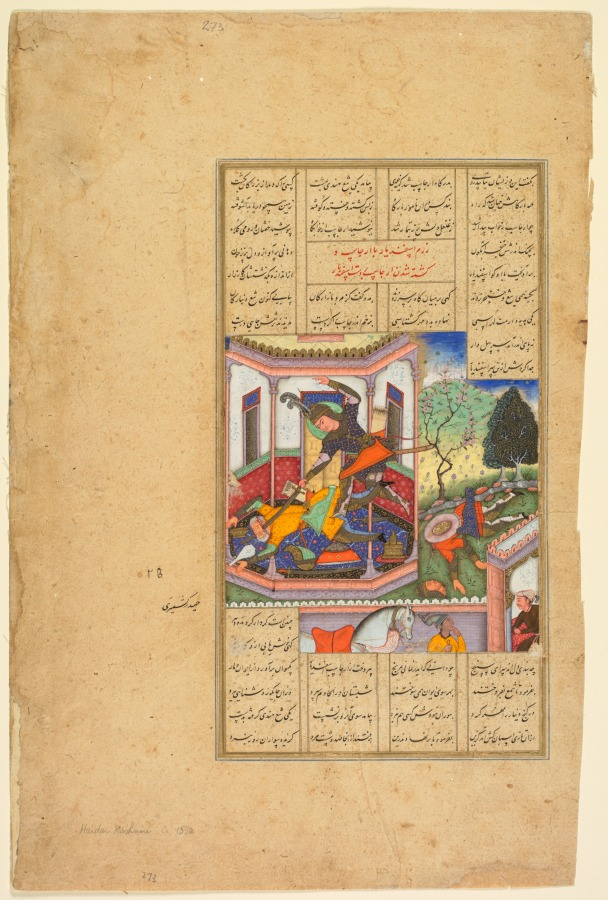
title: Isfandiyar slays Arjasp, the king of Turan, from a Shah-nama (Book of Kings) of Firdausi (Persian, about 934–1020)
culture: Mughal India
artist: Haidar Kashmiri (Indian, active late 1500s-early 1600s)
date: 1600–1605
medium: Gum tempera, ink, and gold on paper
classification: Painting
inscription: Persian inscription in left margin, in nasta‘liq script: 25 / Haidar Kashmiri; Persian title in nasta‘liq script: The Battle of Isfandiyar with Arjasp and The killing of Arjasp by the hand of Isfandiyar; Persian text in nasta‘liq script: He uttered these words, and hurried away from them Toward Arjasp’s court, bent on revenge He went forth, grasping a blade of Indian steel, Whomever of the notables his eyes fell on, was killed on the way So that in passing through the royal hall Hard it was to pick one’s way: So many wounded, battered, and dead Had turned the ground into a turbulent sea. When Arjasp awoke from his sleep His heart was troubled on hearing the din That he could not make out in the bedchamber. He put on his mail shirt and Roman-fashioned helmet Clutching in hand a burnished dagger, He shouted loud, blood coursing through his heart. The warrior Isfandiyar confronted him. They fought beyond measure and scale, Exchanging daggers and swords in a furious feud At times targeting the head, at times the waist, To him he (Isfandiyar) said, “Now from the tradesman Will you receive the gift of a blade, one glittering like a silver denarius. I have it as a gift for you, worthy enough to come from Luhrasp, inlaid with Gushtasp’s seal. He made Arjasp go limp and lifeless by the delivered cuts Nowhere on his body did he leave untouched. His mammoth body toppled over His head severed from the body by Isfandiyar. Such is the conduct of the revolving fortune: At times it offers us a honeyed potion, at others a deadly poison Why tie your heart to this transient place Since you know that you will not stay forever, do not grieve and pine. Having dealt with Arjasp, Isfandiyar Gutted the palace, its smoke reaching as far as Saturn He ordered torches lit Setting fire to the palace from all sides He entrusted his (Arjasp’s) women’s quarters to a eunuch, Taking all luster away from the place. He sealed off the treasury No one in Turan was now equal to his fight. He went to the stables and mounted A blade of Indian steel in his hand He selected among the Arab horses there And ordered them saddled A hundred and sixty men rode away from there Handpicked riders for the day of battle.; Verso: Text of Isfandiyar slays Arjasp, the king of Turan: Persian inscription in bottom margin, in nasta‘liq script: The army realized Persian text in nasta‘liq script: [cont. from recto] He furnished mounts, moreover, for his sisters, And marched forth from the court-gate of Arjasp, But left a few Iranians, men of name, With noble Sawa in the hold. “When we,” He said, “have gone outside the walls, I and my noble warriors, to the plain, Secure the gate against the Turkman troops, And may my good star aid me. When ye think That I have joined our noble troops outside, Then—let the watchmen from the lookout cry: ‘Blessed be the head and crown of Shah Gushtasp.’ And when the Turkman troops come toward the hold, In flight retreating from the battlefield, Then you shall throw the head of King Arjasp Before them from the tower of the watch.” The valiant hero rushed upon the plain, And slaughtered all the Turkmans that he found. As he approached the troops of Bishutan They saw and praised him in amazement that he, Who was so young, should show such bravery. When the moon had left her silver throne, And when three watches of the night had passed, The watchman shouted lustily, proclaiming: “Gushtasp, the Shah, has gained the victory, And may Isfandiyar be ever young. May heaven, moon, and fortune be his helpers, Who has in vengeance for Luhrasp beheaded Arjasp and, adding luster to our Grace And customs, cast him down from throne to dust, And made the name and fortune of Gushtasp Resplendent.” Hearing such a cry the Turkmans All listened while Kuhram grew dark of heart By reason of that watchman, was astonished, And spoke thus to Andariman: “How clear This cry is in the night! What do you say Can be the cause? Let us consult, for who Would dare to bawl thus by the monarch’s couch And after dark? What tricks might such a one Play in the day of battle, and thus bring Our nobles into straits! So send and have His head cut off, whoever he may be. If one of our own household is our foe, And he is backing up our enemies. “With evil words and evil presages, Then will we brain him with an evil mace.” Now when the cry went on persistently Kuhram was stricken to the heart with anger Against the watchman whose utterance, spread abroad In such a fashion, filled the nobles’ ears. The soldiers said: “The shouts increase, beyond A watchman’s! Let us drive the foemen forth And after take this host” Kuhram, who was straitened At heart about that watchman, writhed and frowned. He told the troops: “These men have filled my heart With dread about the king. We must return At once, past question. What may happen after I know not.” So that night they left the field, Where Isfandiyar, with ox-head mace And wearing mail, pursued them. When Kuhram had reached The portal of the hold, and saw the Iranians Pursuing, “What is left us,” he exclaimed: “But to fight with brave Isfandiyar? Unsheathe and send your message by the sword.” But fortune frowned and those famed chiefs fared ill. The two hosts raged and smote each other's heads Till morning came, and then the chiefs of Chin Had had their day. Ascending to the ramparts The warriors of Isfandiyar inside The hold flung down therefrom the severed head Of brave Arjasp—the king that had slain Luhrasp. The Turkmans fought no longer; from their host Arose a cry, and all the troops unhelmed. The two sons of Arjasp wept and were consumed As in a fierce fire, while all the army knew What they must weep for on that evil day. (closely adapted from Warner and Warner 1912, 152)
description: This illustrated scene occurs early in the narrative of Isfandiyar, who is destined to serve as king of Iran with Rustam as his champion. The episode describes Isfandiyar’s quest for vengeance against the tyrant Arjasp of Turan, who had defeated his father in battle and taken his sisters captive. Isfandiyar disguised himself as a merchant, entered Arjasp’s fort, and then fought his way to the enemy king, whom he defeated in battle. The artist has included beautiful and delicate details of the garden and architectural setting of this gruesome scene. An onlooker below puts his finger to his mouth in a gesture of astonishment.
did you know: Wine spilling from a porcelain bottle heightens the action of the moment.